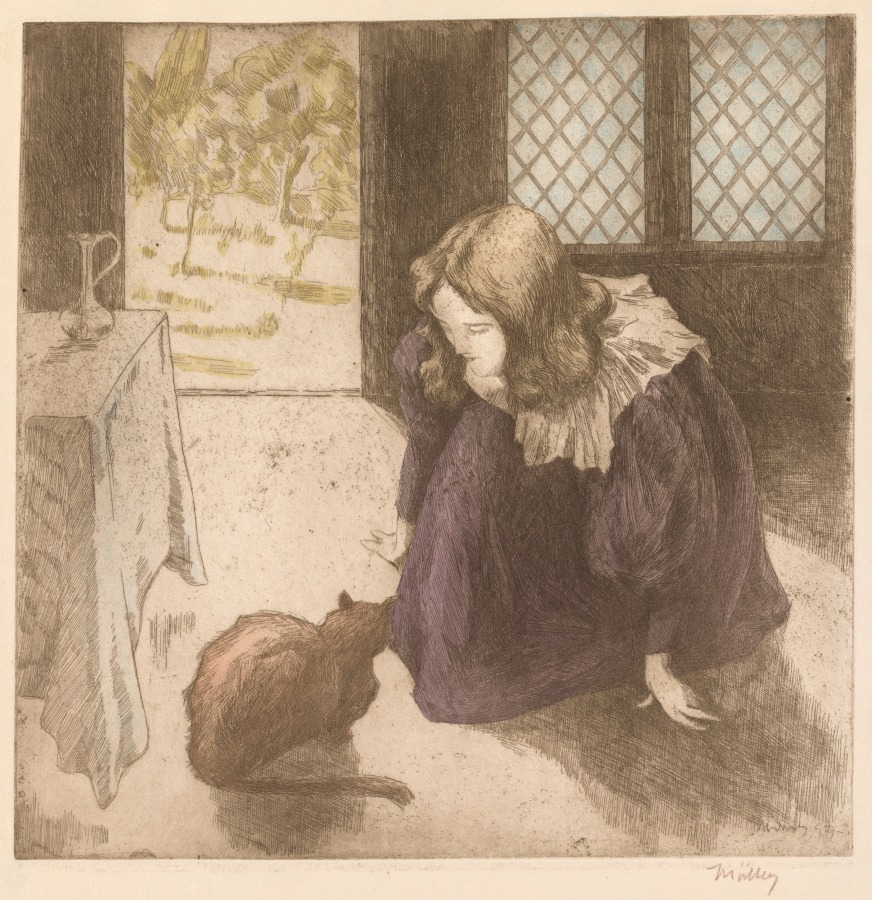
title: Interior, Little Girl with Cat (La Petite fille au chat)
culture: Italy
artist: Alfredo Müller (Italian, 1869–1940)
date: 1897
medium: etching and aquatint with handcoloring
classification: Print